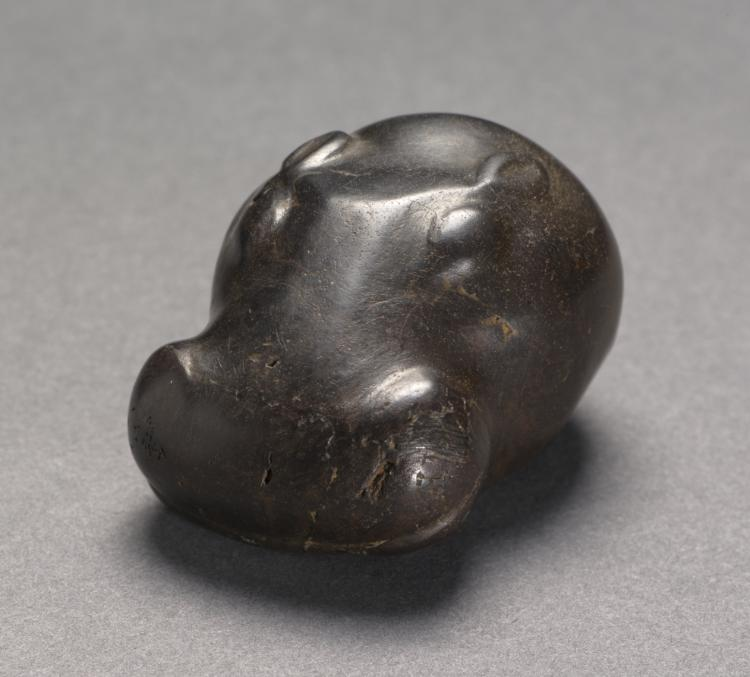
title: Weight in the Form of a Hippopotamus Head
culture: Egypt, New Kingdom (1540–1069 BCE), Dynasty 18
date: c. 1540–1296 BCE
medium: hematite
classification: Implements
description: Sensuously carved and polished to a silky luster, this weight takes the form of a hippopotamus head. Eyes, ears, and nostrils ae modeled in relief; the mouth is closed. The flat underside provides a surface on which to rest the object. This hippo head weighs 62.1 grams, roughly three-quarters of a deben, a unit of weight in ancient Egypt. As such it does not correspond to any of the more usual subdivisions of the deben, although similar examples are known. In fact it is an inter-standard weight, representing eight seniu or two-thirds of a deben, and is equivalent of an Aegean unit of 62.1 grams.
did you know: The word hippopotamus comes from the ancient Greek for "river horse" (ἱπποπόταμος).